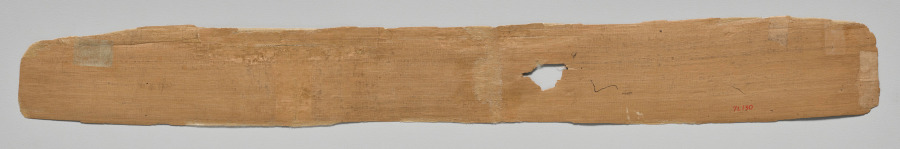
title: Folio 1, from a Great Poem about Twos (Dvyashraya Mahakavya) of Hemachandra with Commentary by Abhayatilaka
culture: Western India, Gujarat, possibly Patan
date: 1428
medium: Gum tempera and ink on palm leaf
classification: Painting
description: The first two folios of this manuscript commentary have adjoining paintings: the first is the green image of Parshva, a liberated being known as a Jina, and the second depicts the author of the text, Hemachandra (1088–1173), as a monk with his royal patron Kumarapala (reigned 1143–1172). The text of this manuscript illustrates grammatical points of both Sanskrit and Prakrit—a living language derived from Sanskrit—with examples of the wondrous deeds of his kings.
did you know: Hemachandra was a celebrated poet, historian, grammarian, philosopher, and theologian of medieval India.